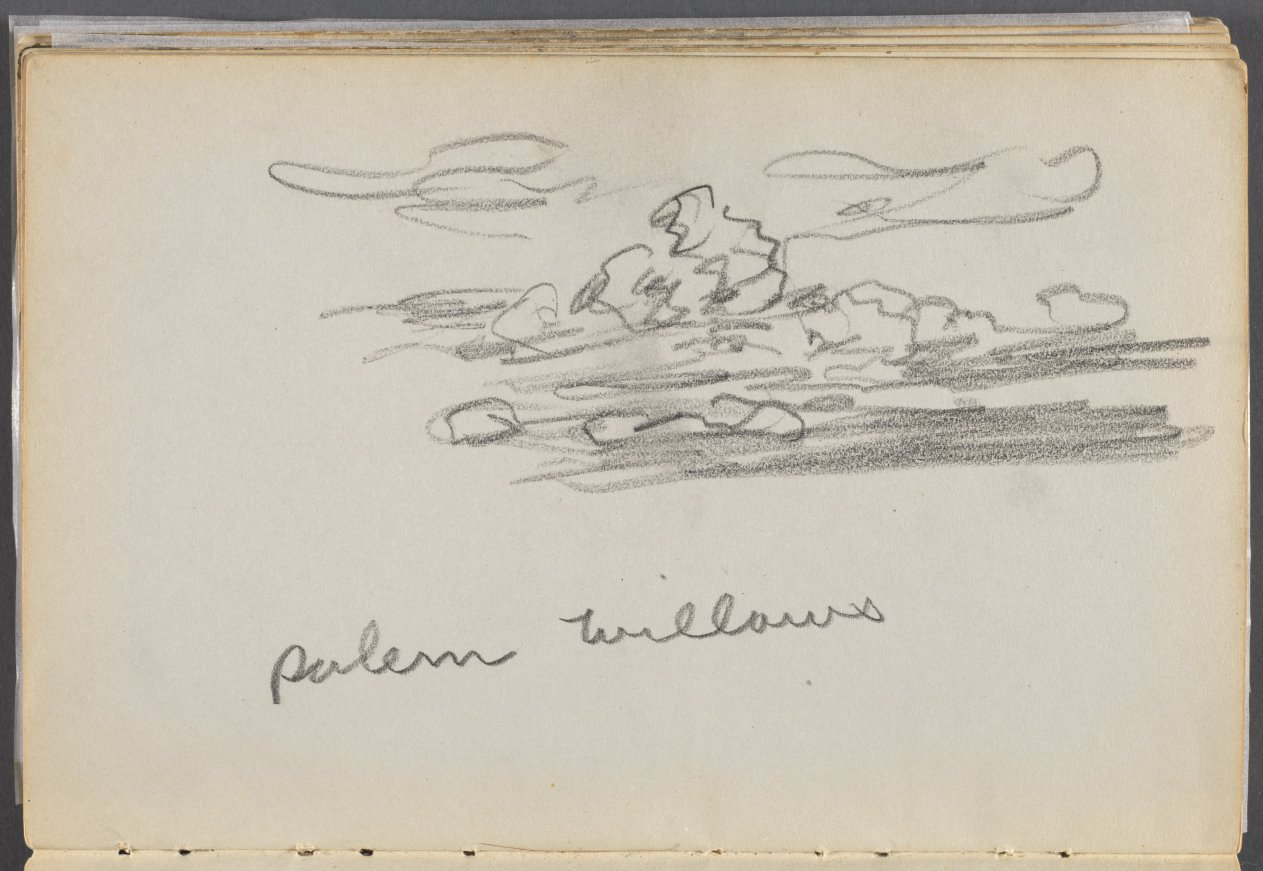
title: Sketchbook, The Dells, N° 127, page 184: "Salem Willows"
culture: America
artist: Maurice Prendergast (American, born Newfoundland [now Canada], 1858–1924)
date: c. 1919–1921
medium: graphite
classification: Bound Volume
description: This sketchbook contains 59 pages of graphite drawings and 16 watercolors made at various locations on Cape Ann, Massachusetts.